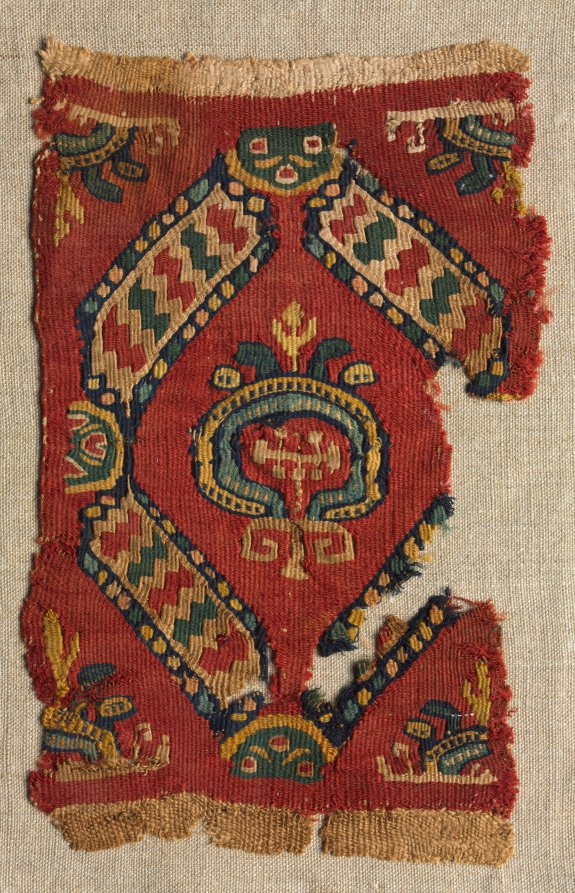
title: Fragmentary Ornament from a Tunic with Lozenges and Medallions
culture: Egypt, Abbasid period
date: mid 700s - mid 800s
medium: tapestry weave; wool and linen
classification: Textile